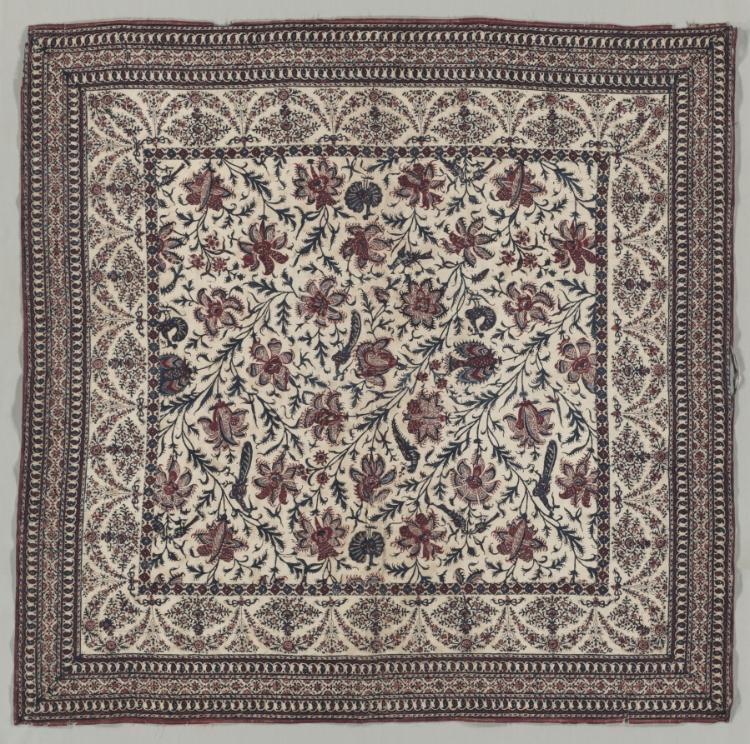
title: Textile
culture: India or Iran (Persia), 19th century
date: 1800s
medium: plain weave cotton, printed and painted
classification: Textile